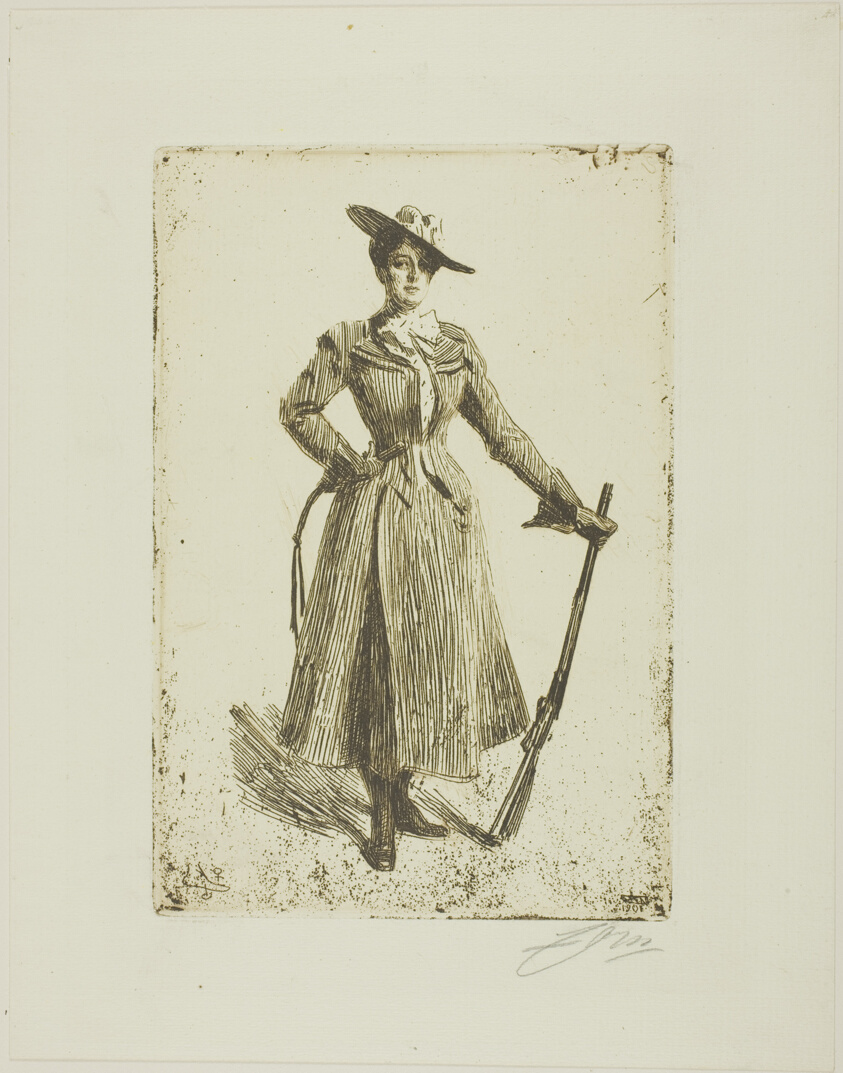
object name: Print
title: Mrs. Thompson Seton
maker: Anders Zorn (Swedish, 1860-1920)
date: 1901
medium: Etching on ivory laid paper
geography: Sweden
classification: etching; print; prints and drawing